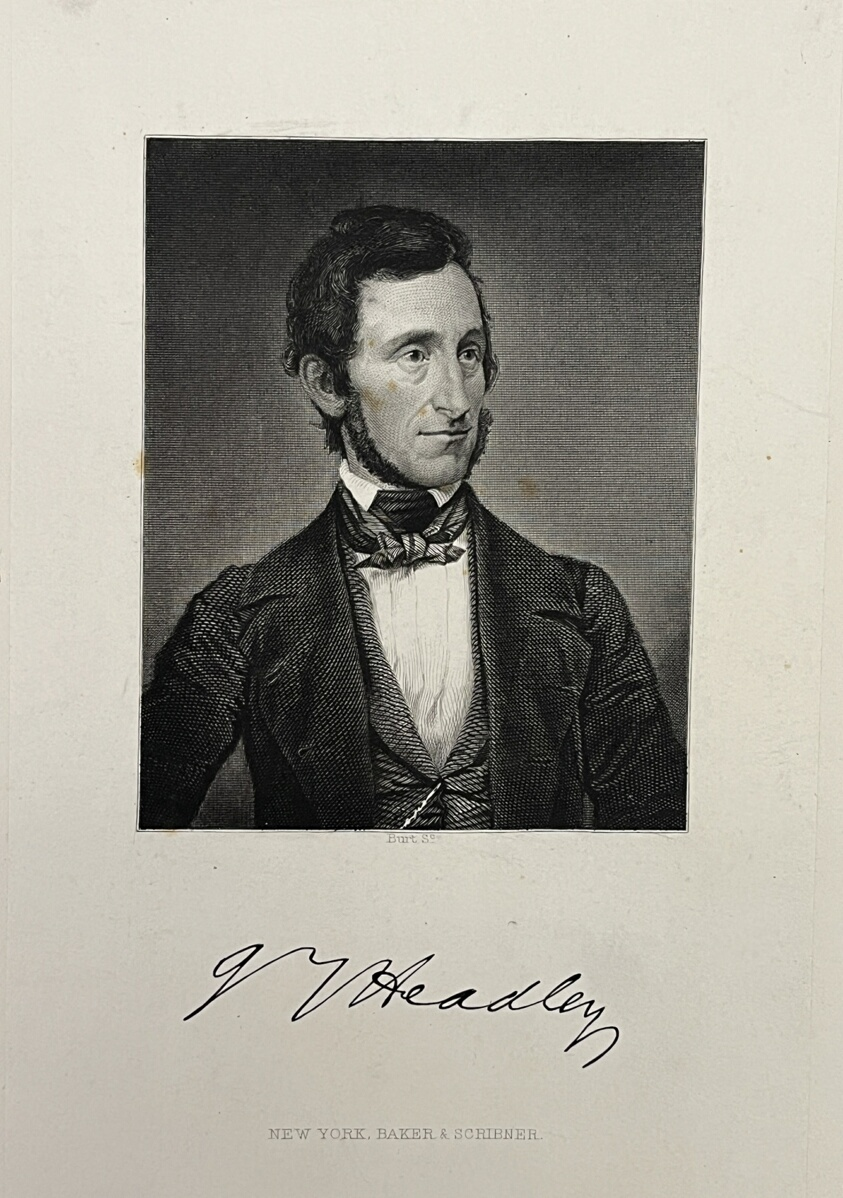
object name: Print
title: V Meadley [?]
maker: Artist Unknown (Likely American, 19th century)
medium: Etching on paper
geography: United States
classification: reproduction; print; prints and drawing